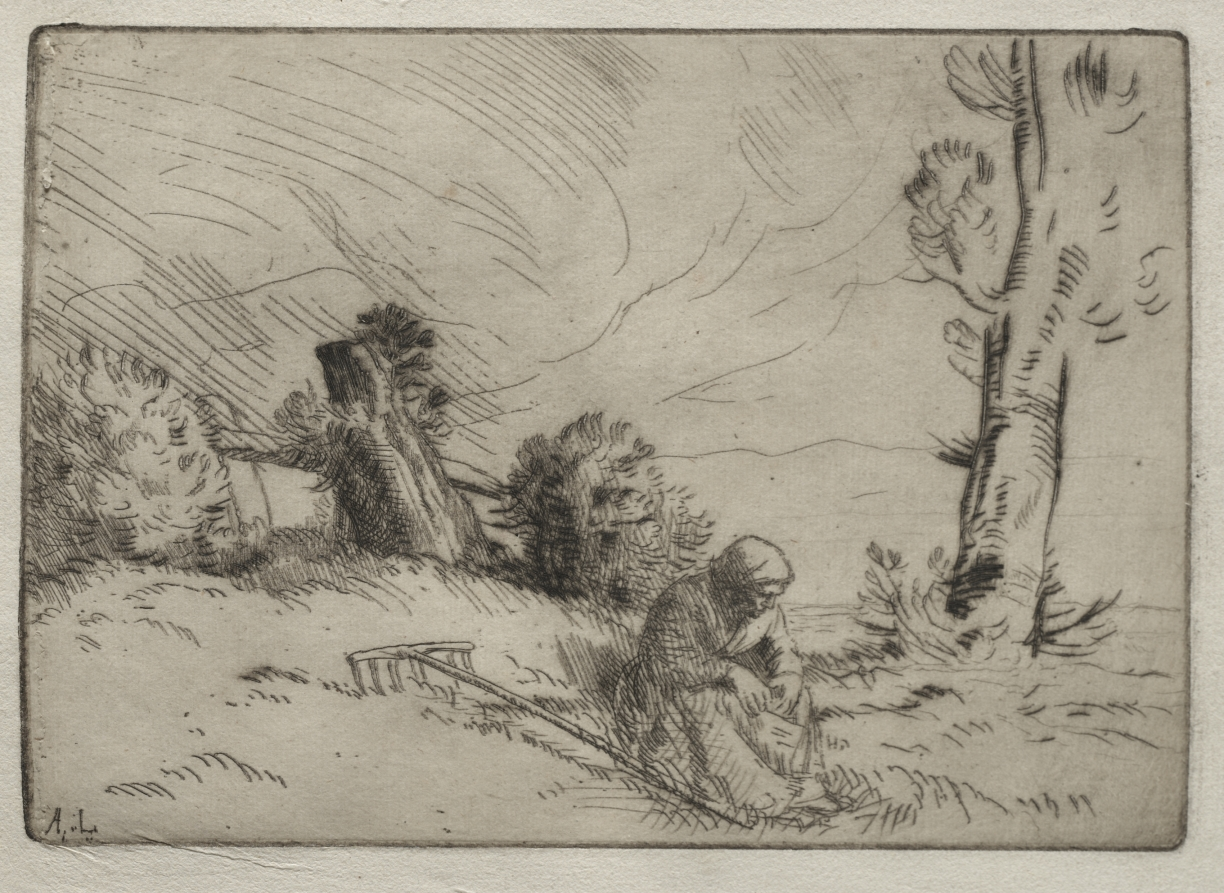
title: Peasant Woman Seated near a Hedge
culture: France, 19th century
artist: Alphonse Legros (French, 1837–1911)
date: c. 1857–1911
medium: drypoint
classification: Print